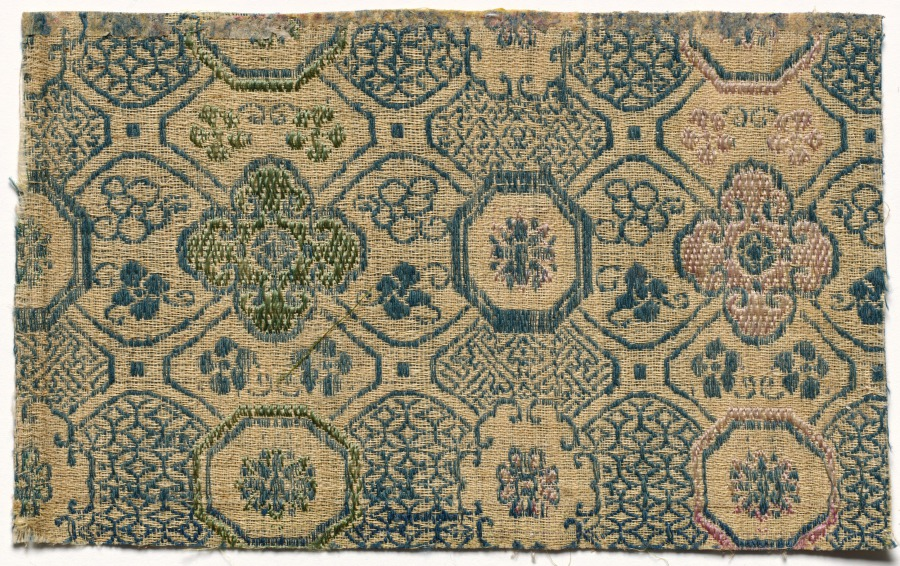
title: Textile Fragment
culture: Japan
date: 1800s - early 1900s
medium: silk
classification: Textile